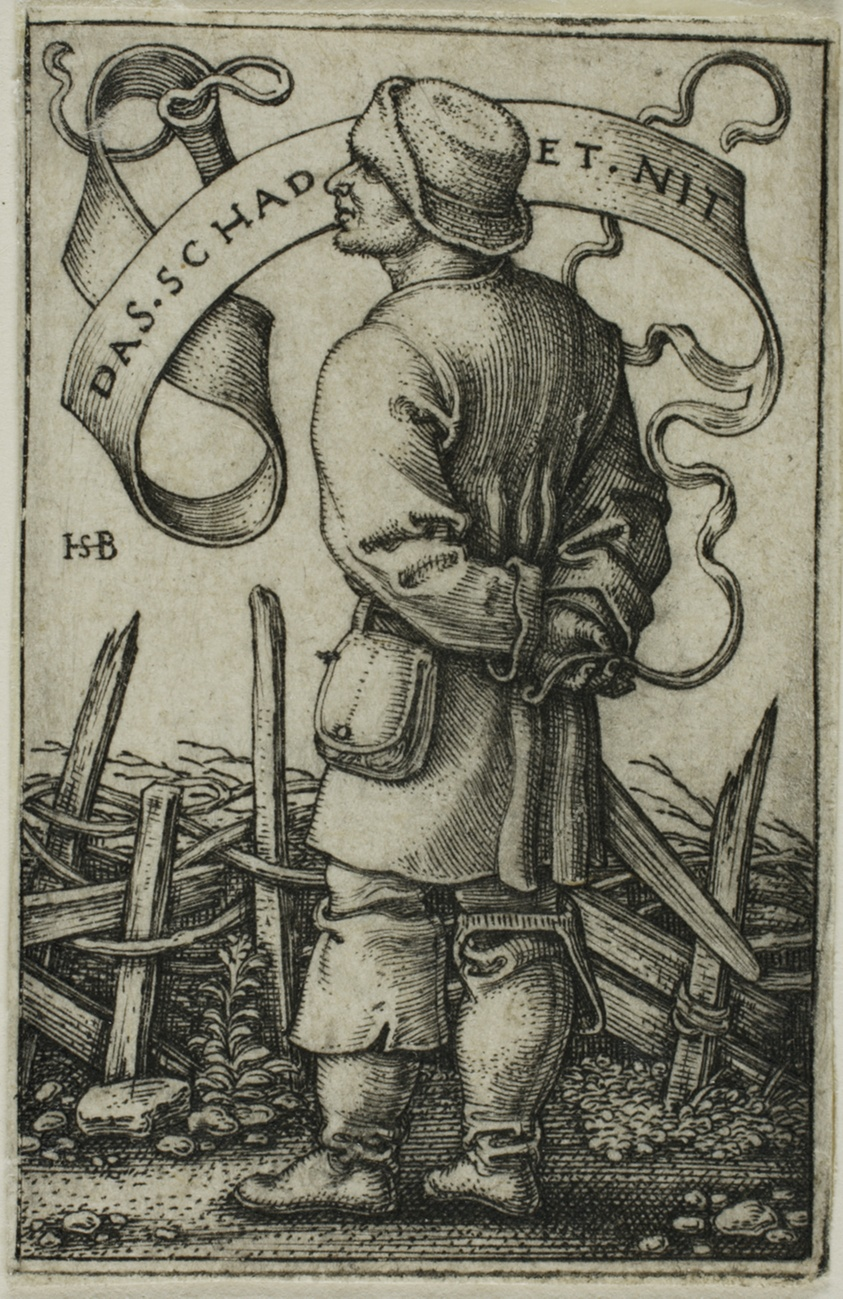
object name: Print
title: The Weather Peasant "Das Schadet Nit"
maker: Sebald Beham; German, 1500-1550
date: c. 1542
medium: Engraving in black on ivory laid paper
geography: Germany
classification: engraving; print; prints and drawing